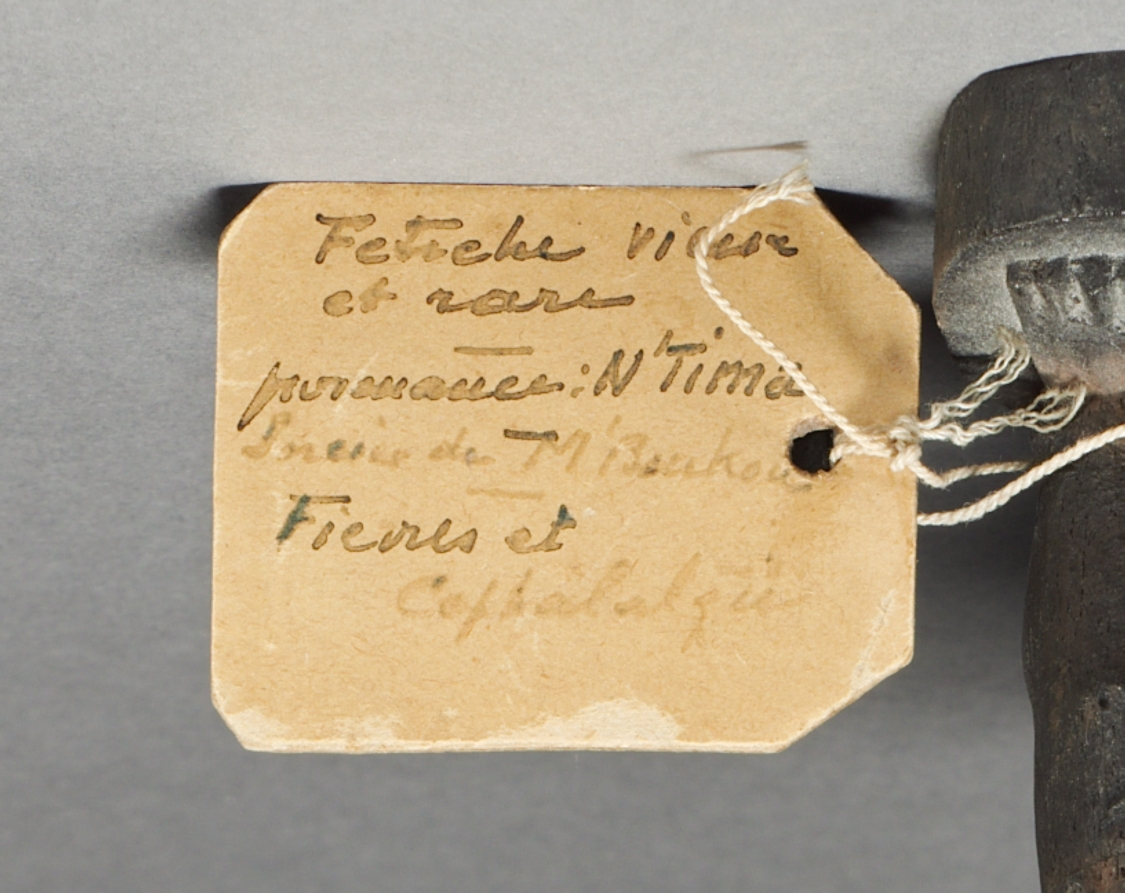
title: Power figure (nkisi)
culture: Africa, Central Africa, Republic of the Congo, Kongo-style maker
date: late 1800s–early 1900s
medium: Wood, feathers, organic material (including resin), iron, and possibly porcelain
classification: Sculpture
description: This figure had lost its nkisi load on the belly, but now shows how the mixture of earth, resin, leaves, glass, and other items was fixed onto the wooden figure, supported by four nails. It had been the property of “the sorcerer of Mboukou.”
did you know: This niksi figurine shows how the mixture of earth, resin, leaves, glass, and other items was fixed. It had been the property of “the sorcerer of Mboukou.”